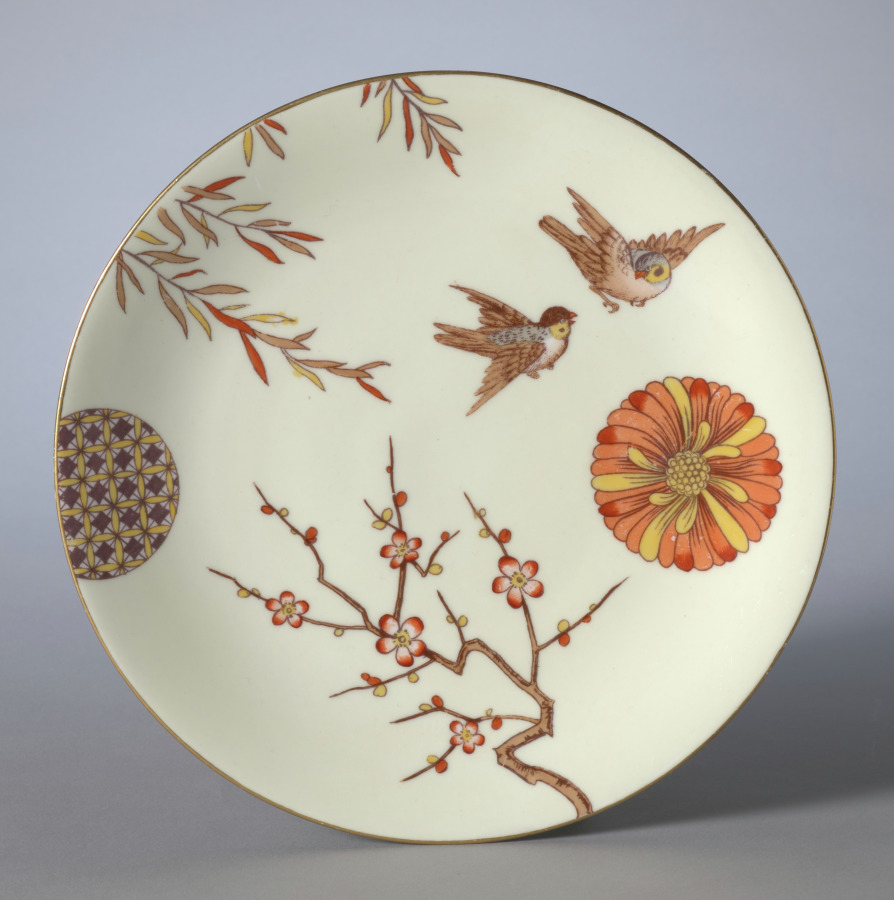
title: Plate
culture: England, 19th century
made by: Minton Pottery and Porcelain Factory (British)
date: 1880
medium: porcelain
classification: Ceramic